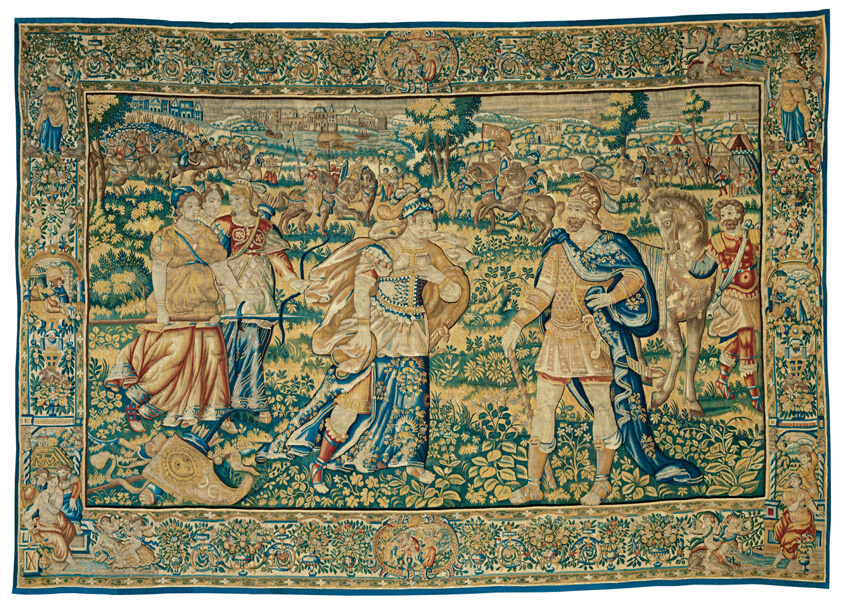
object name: Textile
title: Alexander Encounters Thalestris, Queen of the Amazons, from The Story of Alexander the Great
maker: Flanders, possibly Tournai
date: c. 1600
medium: Wool and silk, slit and double interlocking tapestry weave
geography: Flanders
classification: weaving - tapestry; textile